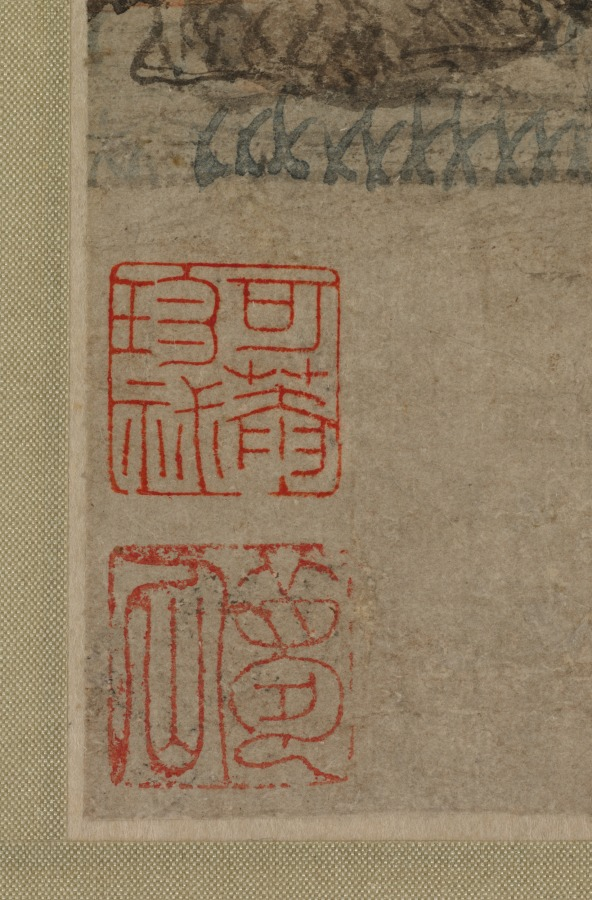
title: Empty Arbor and Rapid Waterfall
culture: China, Ming dynasty (1368–1644)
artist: Zhang Ning (Chinese, 1426-c. 1495)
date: 1468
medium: hanging scroll, ink and color on paper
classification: Painting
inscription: Artist's inscription, signature, and 2 seals: Painted in the summer, the fifth month of the wu-tzu year, the fourth year of the Ch'eng-hua era [1468]. Empty Arbor and Rapid Waterfall. Fang-chou, Chang Ning [seals] Ching-chih; Fang-chou ts'ao-t'ang. 2 additional seals: 1 of Ch'eng Ch'i; 1 unidentified.